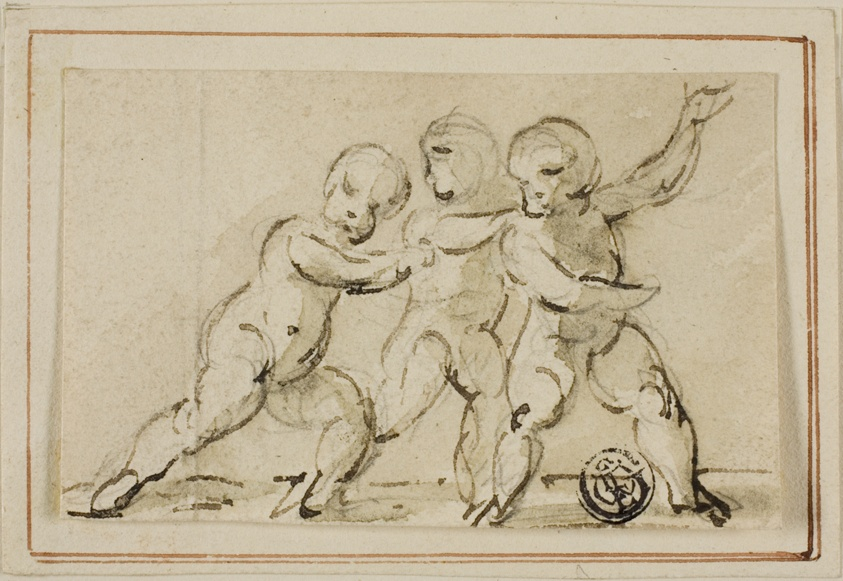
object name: Drawing and Watercolor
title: Three Putti at Play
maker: Attributed to Thomas Stothard (English, 1755-1834); or possibly Samuel De Wilde (English, 1748-1832)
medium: Pen and brown ink with bush and brown wash over graphite, on ivory wove paper, tipped onto ivory wove paper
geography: England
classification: pen and ink drawings; drawings (visual works); prints and drawing